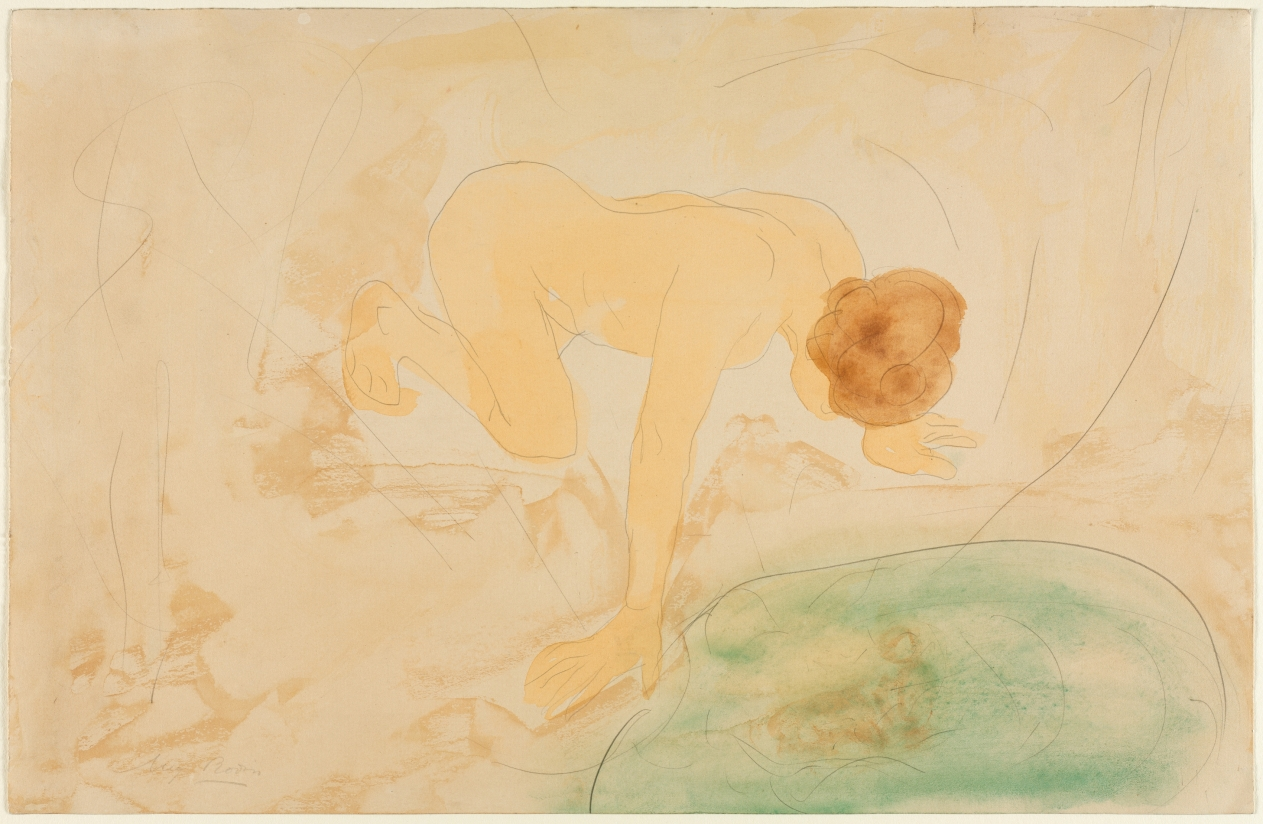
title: The Reflection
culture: France, late 19th Century-early 20th Century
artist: Hand B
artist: style of Auguste Rodin (French, 1840–1917)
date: c. 1900–10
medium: graphite and watercolor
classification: Drawing